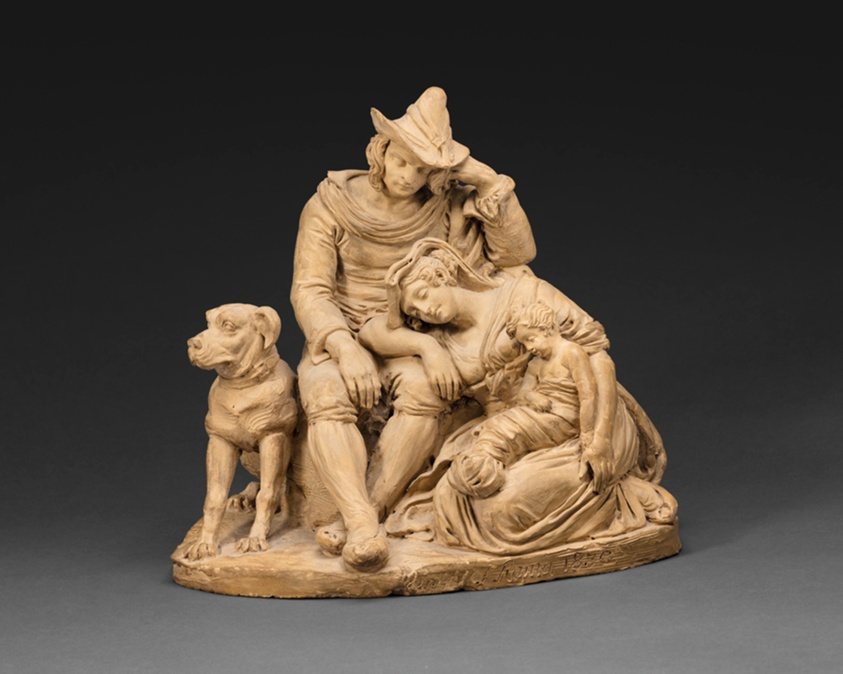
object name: Sculpture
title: Italian Peasants Resting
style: 19th century, nineteenth century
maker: Bartolomeo Pinelli (Italian, 1781–1835)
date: 1832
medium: Terracotta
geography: Italy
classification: statuette; sculpture; Italian; terracotta (sculpture)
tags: peasants, child, children, dog, families, man, sleep, woman